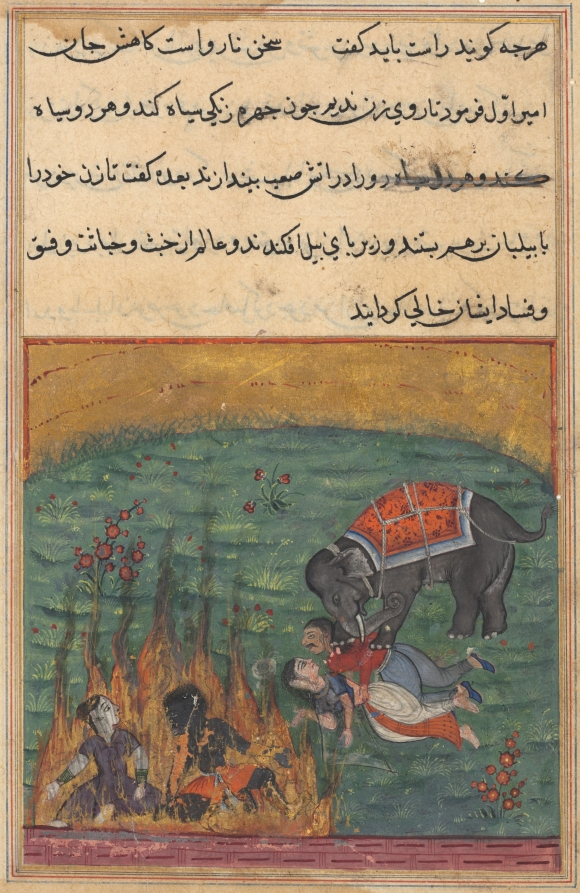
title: As punishment, the jester’s wife and the Zangi are thrown into fire and the emir’s wife and the mahout are trampled by an elephant, from a Tuti-nama (Tales of a Parrot), Twenty-second Night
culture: Mughal India, court of Akbar (reigned 1556–1605)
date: c. 1560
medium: gum tempera, ink, and gold on paper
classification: Painting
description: This painting depicts the closing scene of the tale the parrot tells Khujasta on the twenty-second night. He concludes the story by warning his mistress against committing any acts that would cause her to be laughed at and get her into trouble, like the wife of the emir, who is shown here being trampled to death along with her lover, the elephant driver. While in prison the jester caught them having sex on top of the elephant her lover had ridden up to her window. This brazen transgression made the imprisoned jester laugh so hard that the emir was alerted to the illicit affair. In the lower left the jester’s wife and her African lover, the Zangi, are being burned in punishment for their infidelity.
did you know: This painting shows features of Persian painting that transferred to India in the early Mughal court.